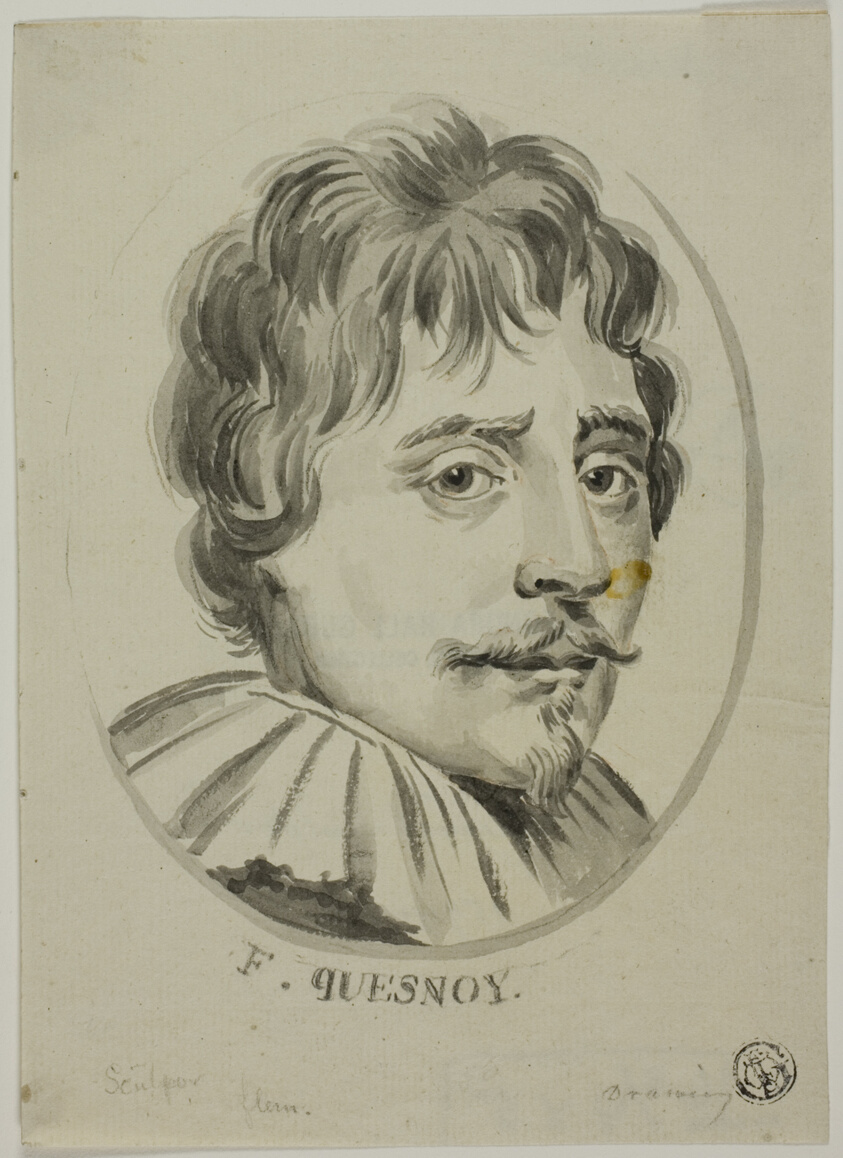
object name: Drawing and Watercolor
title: François Duquesney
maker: Unknown Artist; French, 17th century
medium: Brush and black and gray wash, with touches of red and black chalk, and traces of graphite, on ivory laid paper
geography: France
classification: ink or chalk wash; drawings (visual works); prints and drawing